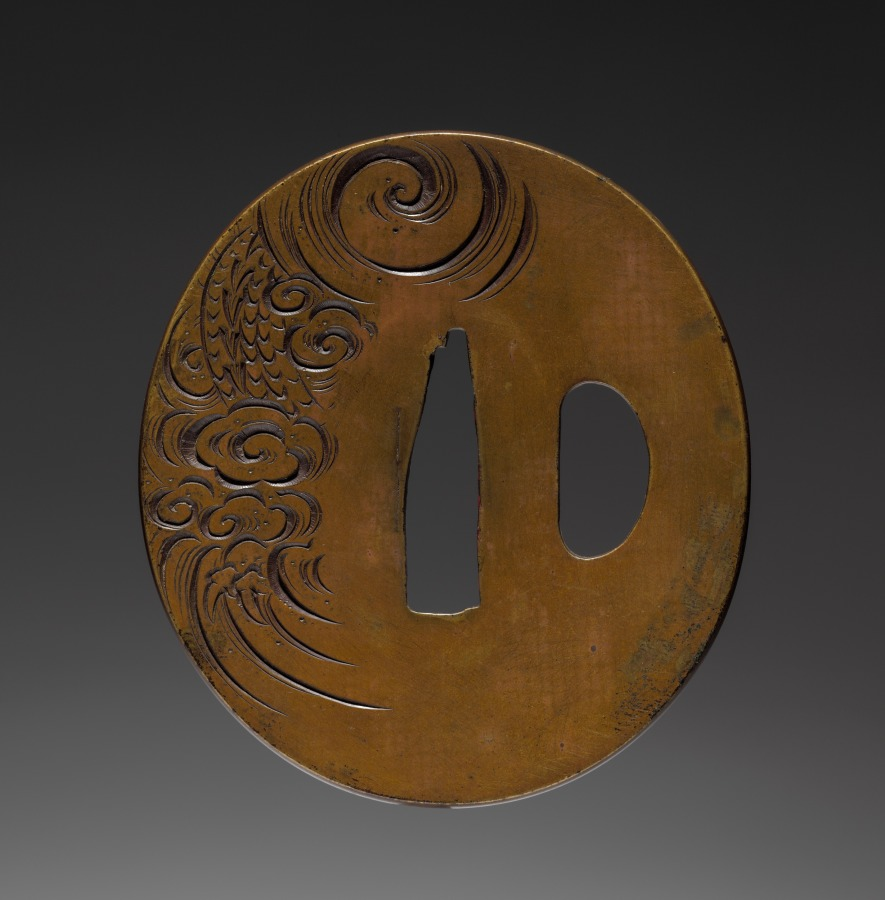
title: Sword Guard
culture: Japan, Edo period (1615–1868)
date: late 1700s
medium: iron (Yokoya type)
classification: Arms and Armor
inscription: signed "Furukawa Jochin made."